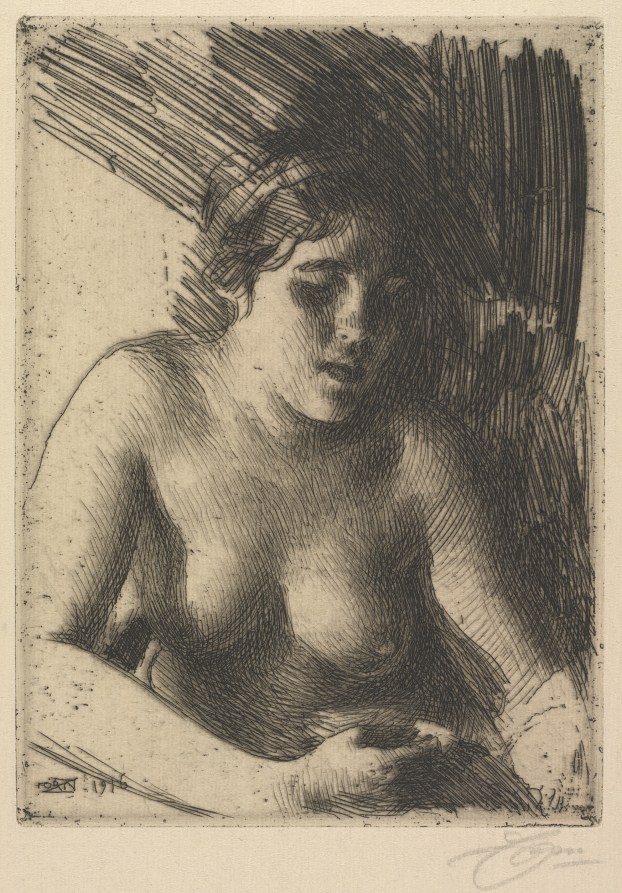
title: Bust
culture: Sweden, 20th century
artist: Anders Zorn (Swedish, 1860–1920)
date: 1916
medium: etching and drypoint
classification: Print